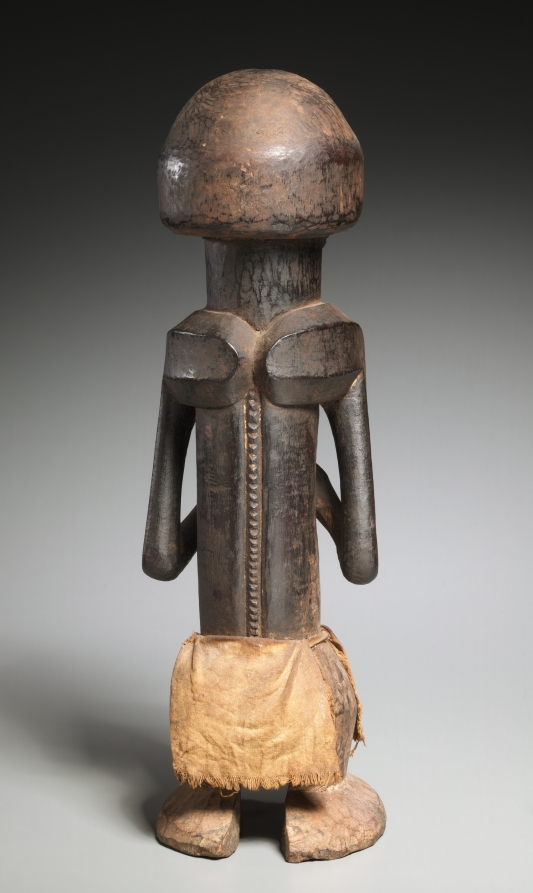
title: Shrine Figure (misi or mishi)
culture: Africa, Central Africa, Democratic Republic of Congo, pre-Bembe style or Boyo-style maker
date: late 1800s-early 1900s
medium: Wood and cotton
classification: Sculpture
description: This figure was used in an ancestral cult dedicated to the founders of small political groupings. Such figures were usually kept in the same shrine with a number of stylistically related male and female carvings that represented ancestors. At times of crisis, the custodian of the shrine spent the night in close proximity to the images, bringing offerings to the ancestors in exchange for their support.